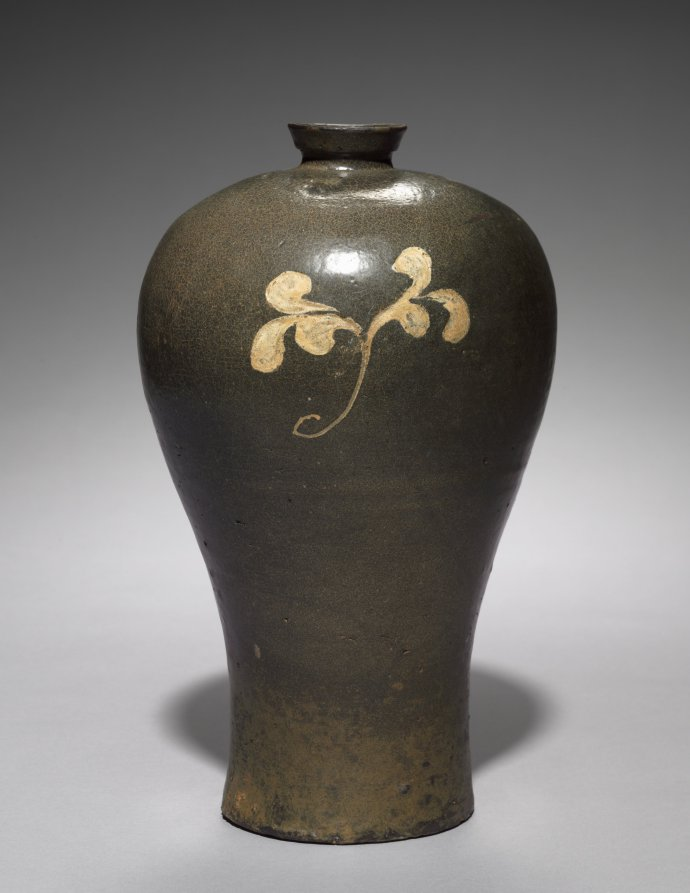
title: Iron-glazed Prunus Vase with Inlaid Floral Design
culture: Korea, Goryeo dynasty (918–1392)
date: 1100s-1200s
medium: iron-black ware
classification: Ceramic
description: As early as the seventh century, the practice of drinking tea and wine became an important part of elite culture in Korea. Once used to store alcoholic beverages, this type of vase features a wide body followed by a sharply rounded shoulder, a short neck, and a small opening. Most of the remaining examples no longer have a lid, but originally it may have had a lid that not only covered the opening, but also served as a cup. Against a brownish-sepia underglaze surface, three ginseng leaves with roots are inlaid with white slip, striking a modern, minimalistic style.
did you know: The inlaid image that adorns the shoulder of this vase is ginseng leaves, famous medicinal herbs.